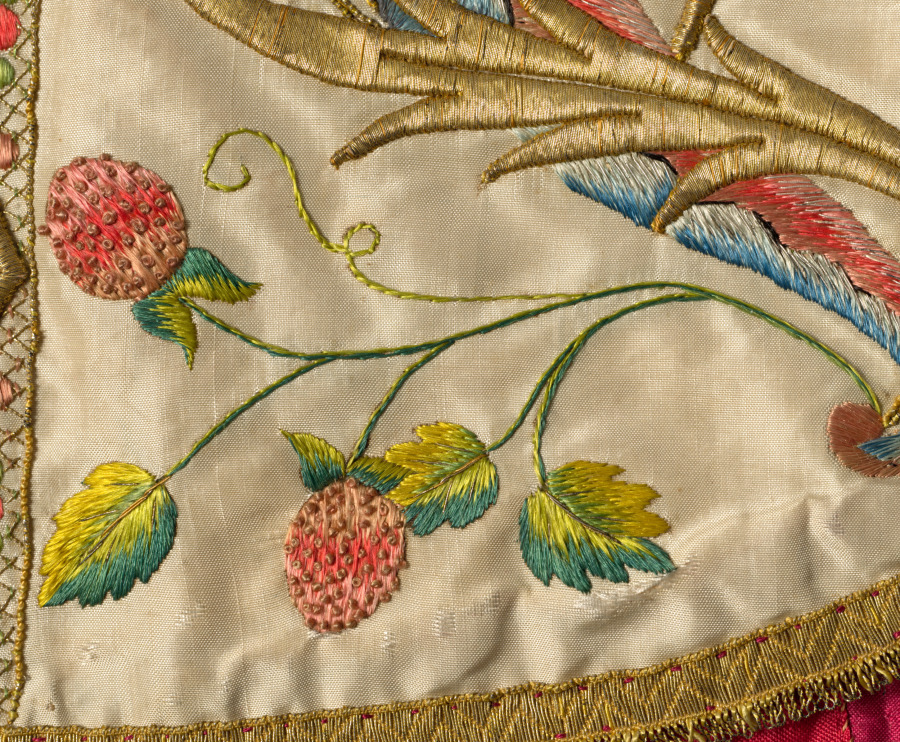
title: Chasuble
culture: Italy or Spain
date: 1700s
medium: Silk and metallic threads: embroidery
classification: Embroidery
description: The chasuble’s exquisite symmetrical decoration highlights its central panel where three illusionary gold containers hold skillfully shaded fruit in pastel silk tones. Delicately curving motifs enhance the side panels along with finely stitched strawberries in so-called French knots. This liturgical chasuble and other vestments, worn over a white alb with lace, were embroidered by professional specialists, such as experts who shaded colored silks or secured gold thread, in early versions of assembly lines that were usually in secular workrooms or in convents. The church or commissioner supplied the raw materials and paid a fee for the work.